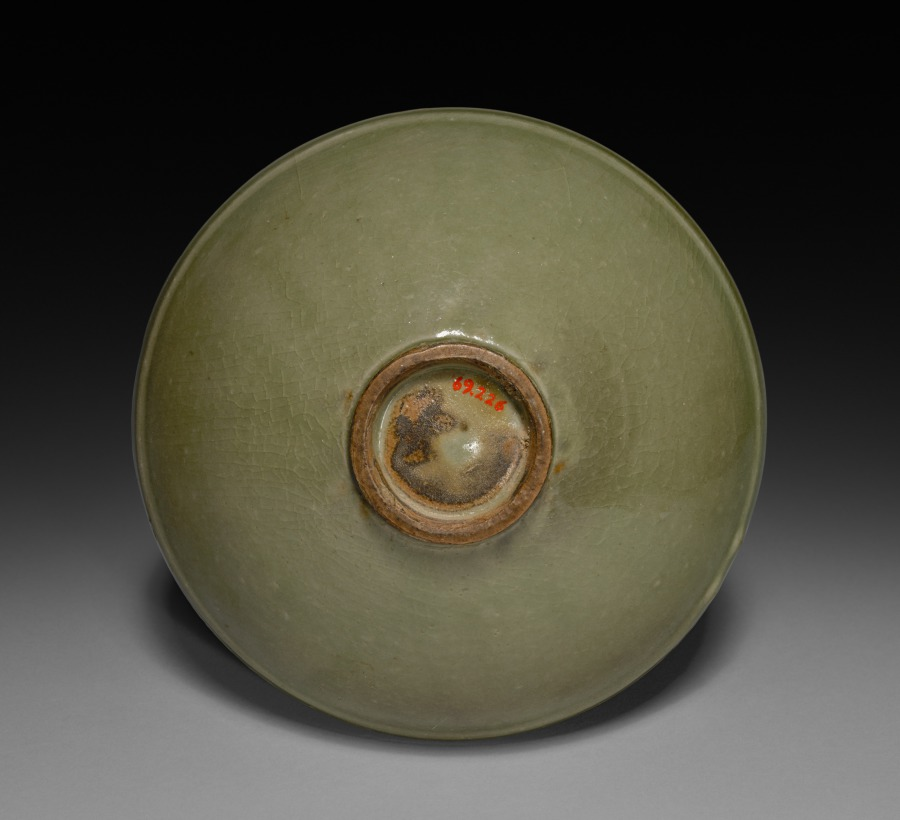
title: Bowl with carved floral decoration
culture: China, probably from the Yaozhou kilns, Shaanxi Province, Northern Song dynasty (960-1127)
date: 1100s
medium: Glazed porcelain, Northern Celadon ware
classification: Ceramic